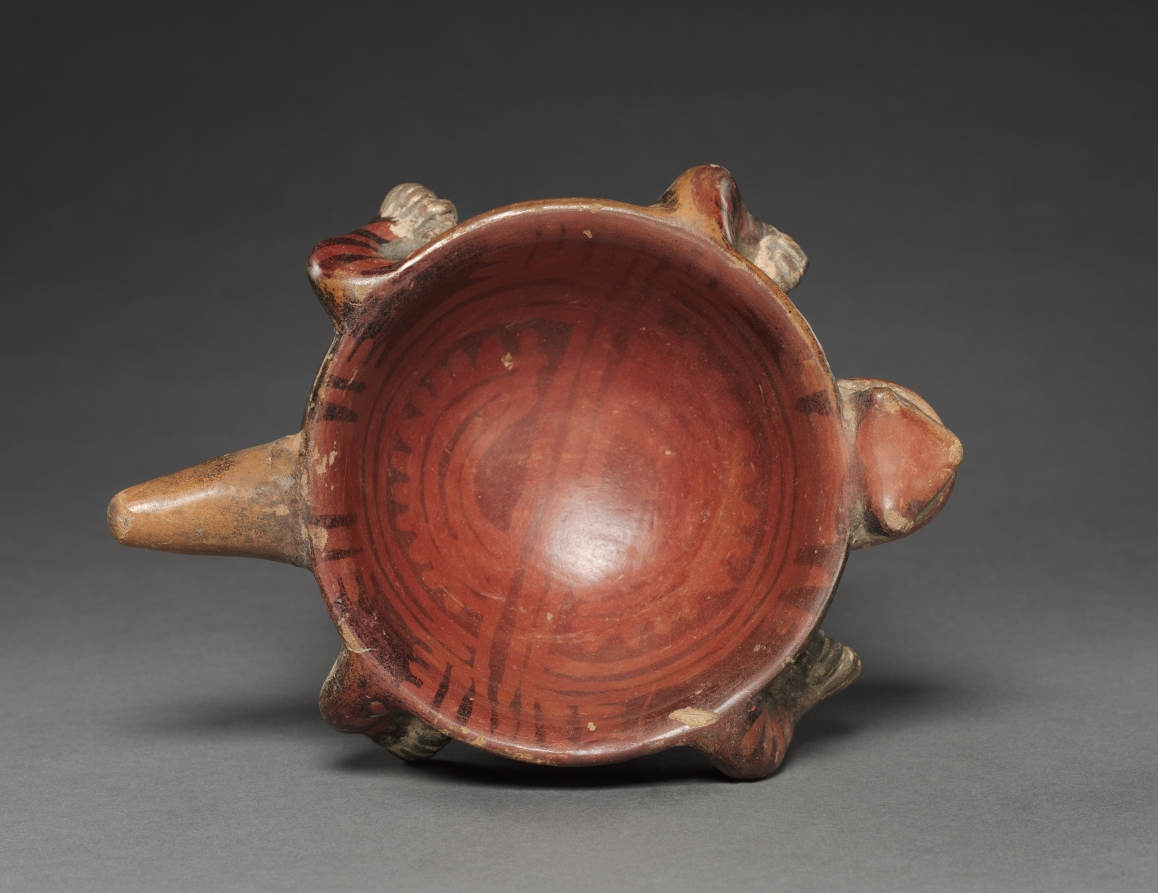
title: Jaguar Bowl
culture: Colombia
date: c. 850–1500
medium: resist-painted earthenware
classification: Ceramic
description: Probably from the southern highland region of Colombia, this unusual vessel has a bowl in the form of a comically fierce jaguar, mounted atop a pedestal base.